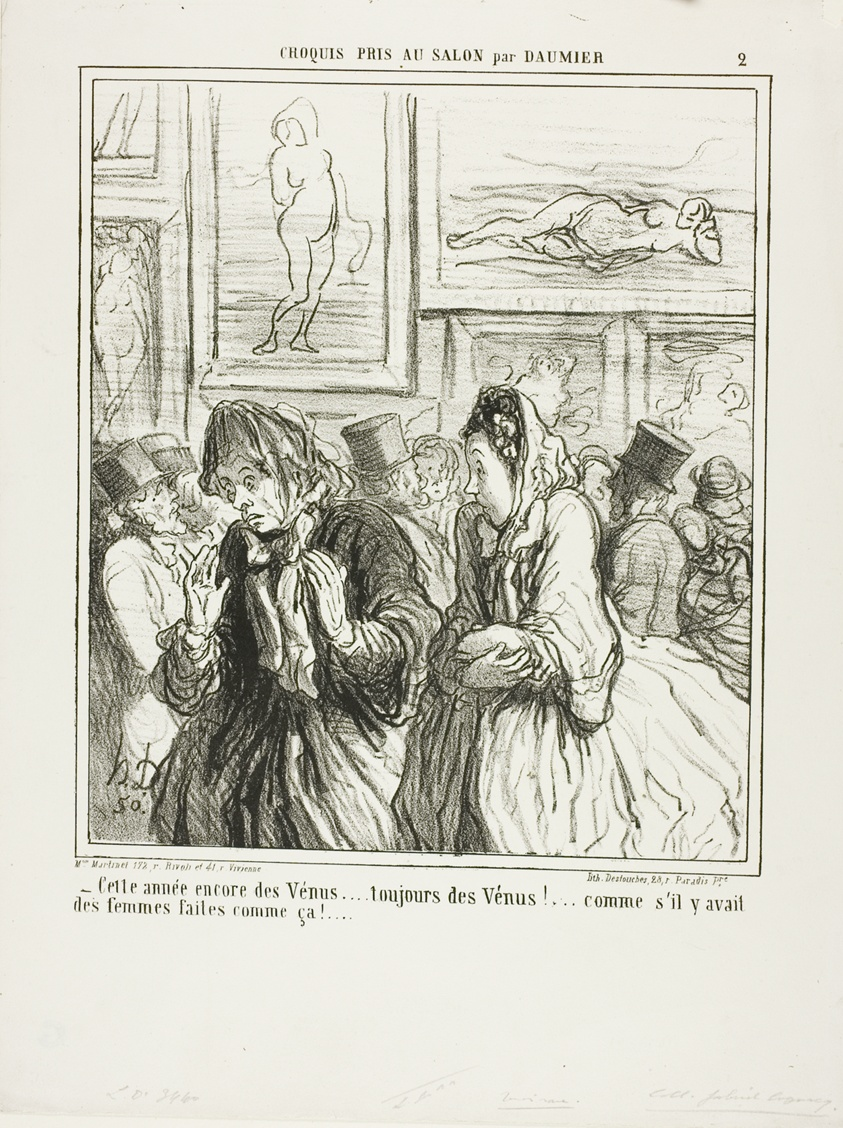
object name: Print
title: “- Still more Venuses this year... always Venuses!... as if there were any women built like that!,” plate 2 from Croquis Pris Au Salon par Daumier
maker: Honoré Victorin Daumier; French, 1808-1879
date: 1864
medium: Lithograph in black on white wove paper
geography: France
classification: lithograph; print; prints and drawing